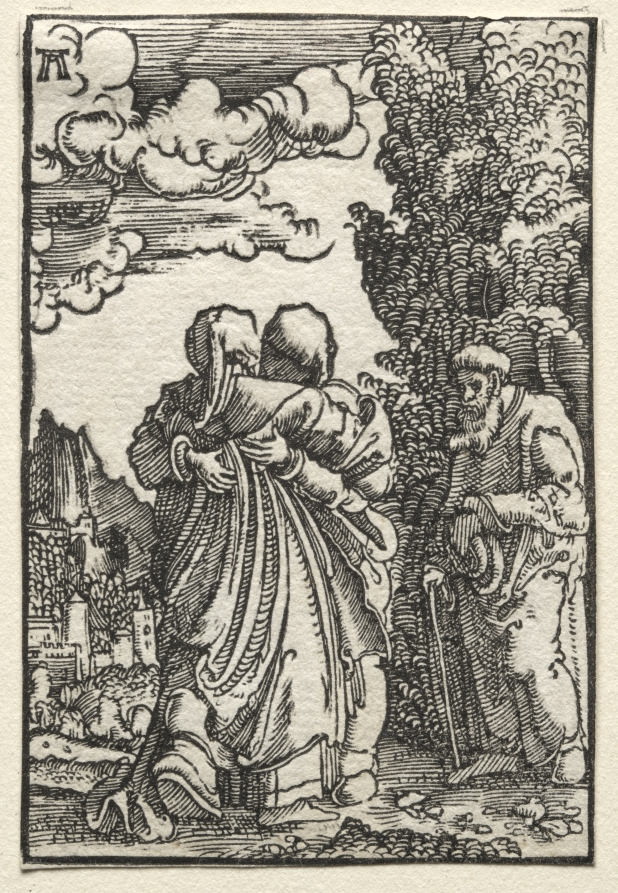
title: The Fall and Redemption of Man: The Visitation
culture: Germany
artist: Albrecht Altdorfer (German, c. 1480–1538)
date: c. 1515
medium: woodcut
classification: Print